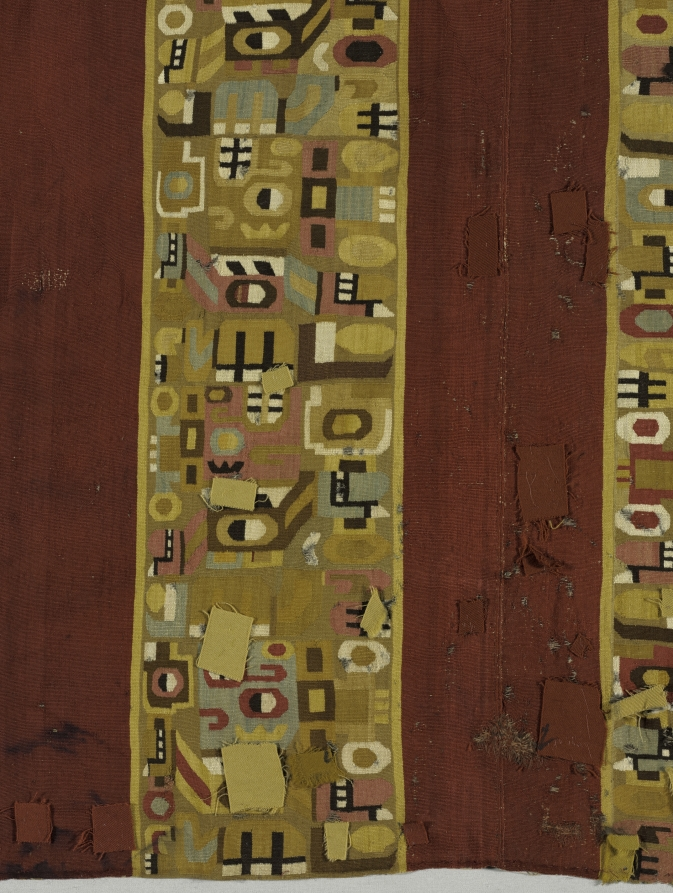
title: Tunic with Sacrificer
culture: South America, Peru, Central Andes, Middle Horizon, Wari people, 7th-11th century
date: 600–1000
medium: camelid-fiber, cotton; tapestry weave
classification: Textile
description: An extremely abstract supernatural sacrifice repeats in different colors and orientations across the body of this tunic, which was shortened on one side in antiquity. Look for the toothy black-and-white mouth in the sacrificer's upward-gazing head; other facial features include a button nose and a vertically divided eye. The figure holds the L-shaped haft of an axe behind its back and, at the front of its body, a short staff with a severed, upside-down human head on the top.